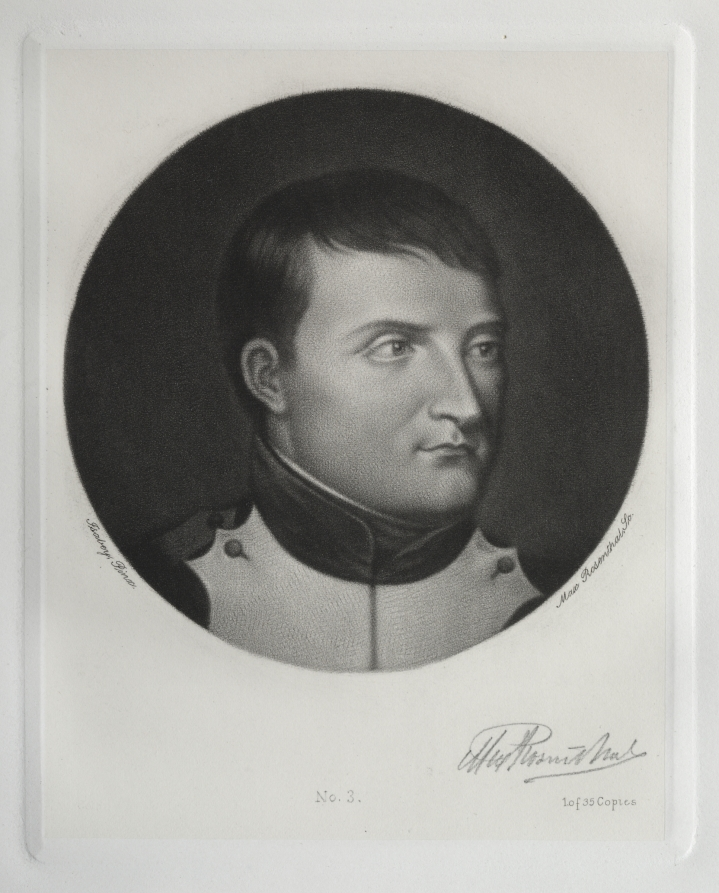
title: Napoleon Bonaparte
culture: America, late 19th-early 20th Century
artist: Max Rosenthal (American, 1833–1918)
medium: mezzotint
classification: Print